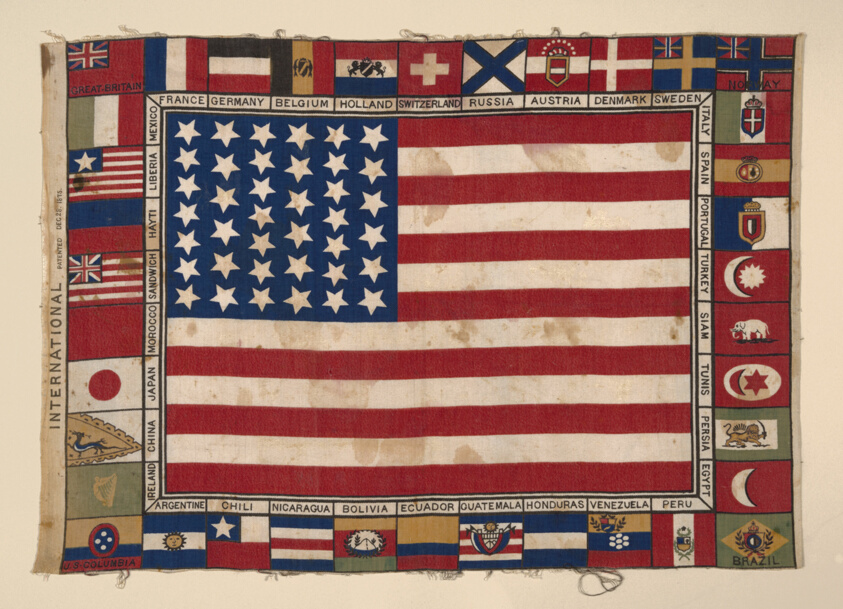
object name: Textile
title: Panel (Furnishing Fabric)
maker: United States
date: 1876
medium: Cotton, plain weave; engraved roller printed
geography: United States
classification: textile; weaving - printed; furnishing textile